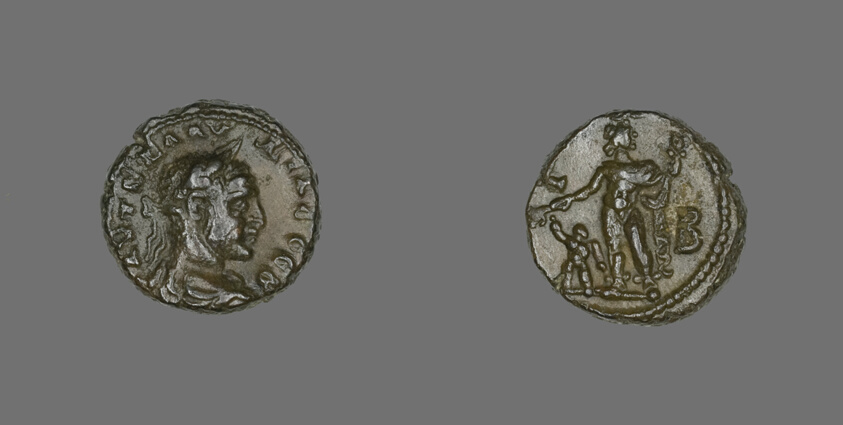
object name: Coin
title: Coin Portraying Emperor Claudius II Gothicus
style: roman (ancient, style or period), ancient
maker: Roman, minted in Alexandria, Egypt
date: 268-270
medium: Billon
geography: Roman Empire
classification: coin; ancient art